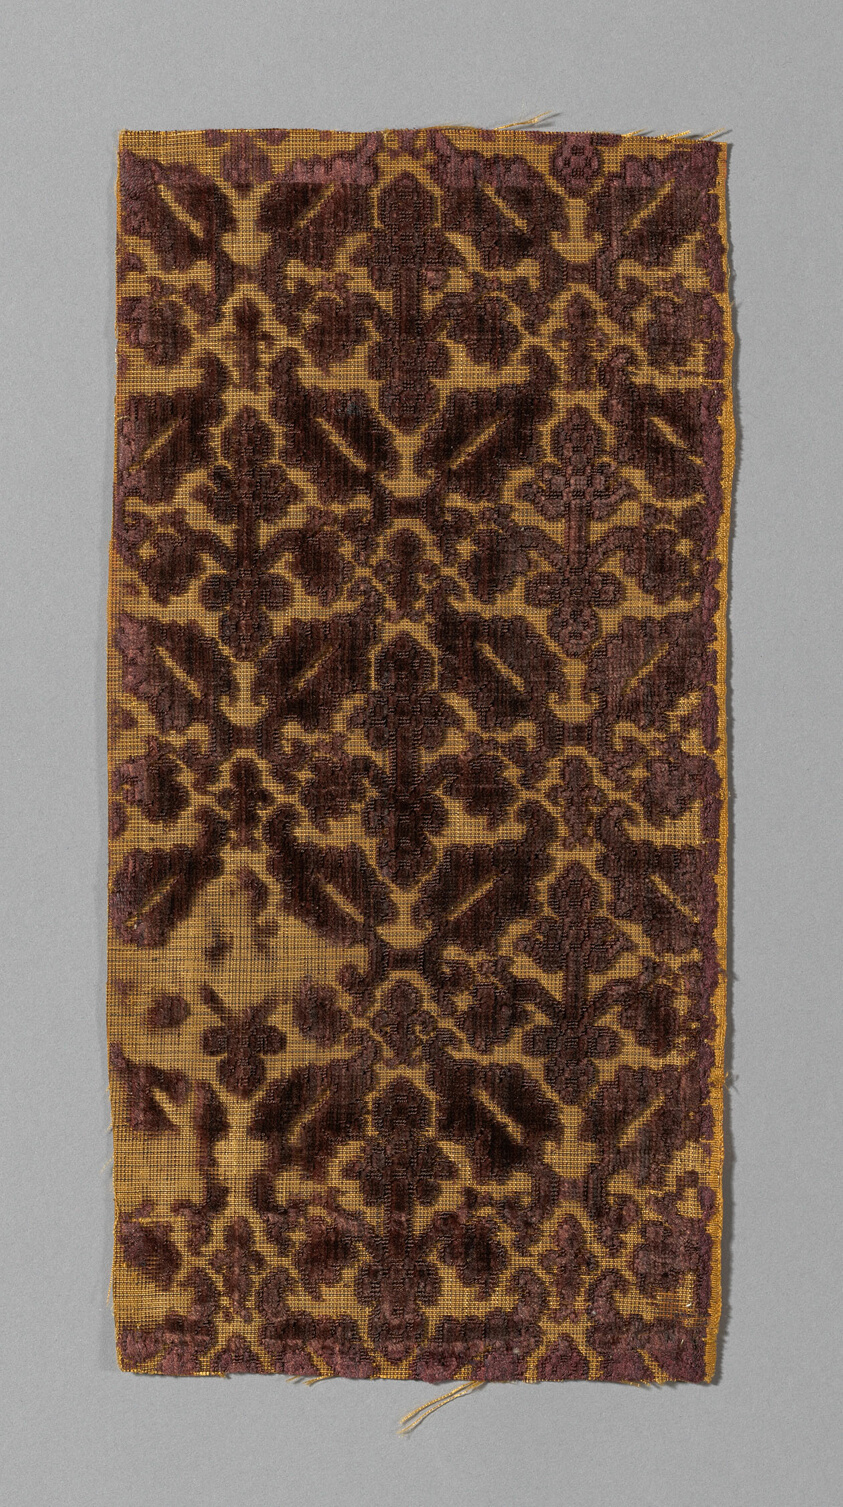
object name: Textile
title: Fragment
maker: Spain or Italy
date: 1625/50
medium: Yellow rep ground; floral pattern of cut velvet outlined with uncut velvet, faded violet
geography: Spain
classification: textile; weaving - velvet; weaving